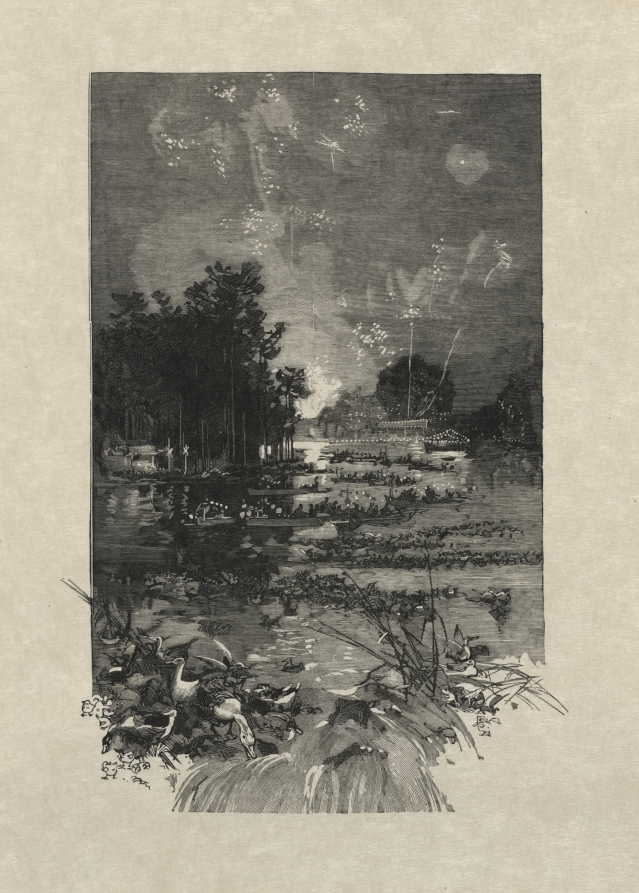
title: The Festival for the victims of duty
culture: France, 19th century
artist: Auguste Louis Lepère (French, 1849–1918)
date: 1884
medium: wood engraving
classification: Print